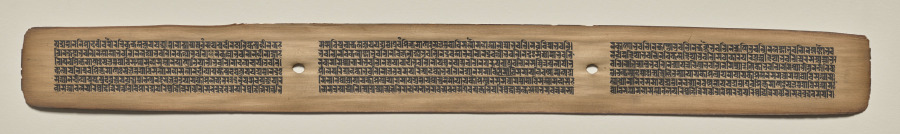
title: Text, Folio 150 (recto), from a Manuscript of the Perfection of Wisdom in Eight Thousand Lines (Ashtasahasrika Prajnaparamita-sutra)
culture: Eastern India, Bihar, Vikramashila Monastery. Painting: Nepal, Kathmandu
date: Sunday, September 14, 1119 (year 239 of the Newar Samvat in the month of Ashvina)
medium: gum tempera and ink on palm leaves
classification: Painting